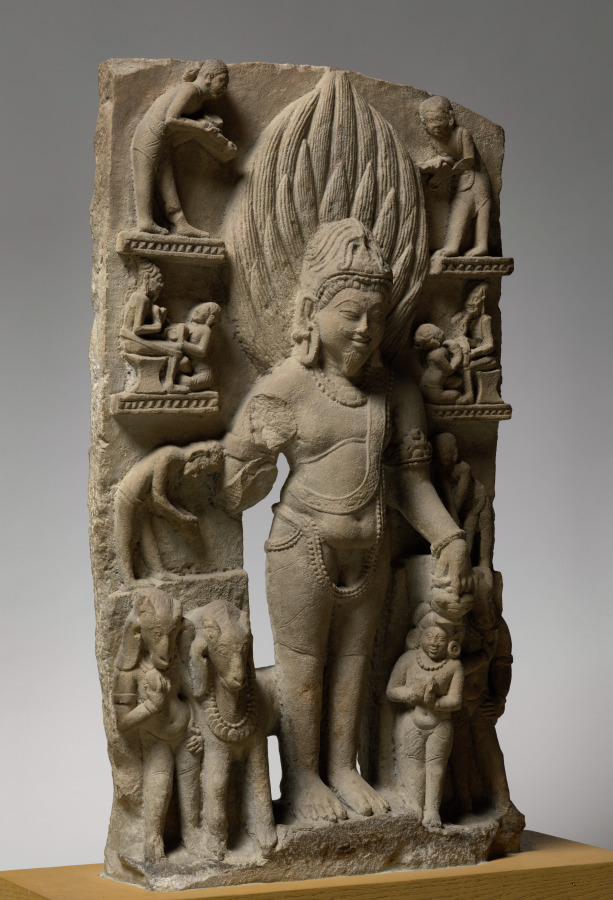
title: Agni, God of Fire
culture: India, Uttar Pradesh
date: c. 1000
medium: sandstone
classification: Sculpture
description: The Hindu god Agni, with flames rising behind him, is the figural form of the sacrificial fire, central to religious practice in India since the early second millennium BC. Agni’s mount is the goat, and together they preside over the Southeast. In the upper registers, Brahmans perform fire sacrifice, preach to disciples, and practice "hot yoga."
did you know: This sculpture is on the cover of the Penguin Classics edition of the Hindu "Laws of Manu."